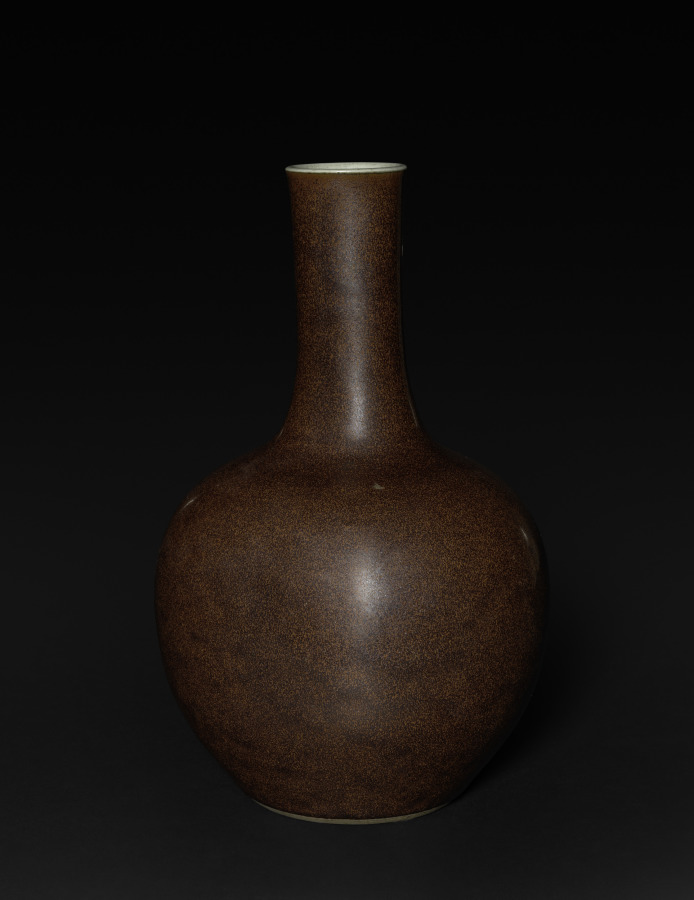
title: Vase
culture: China, Qing dynasty (1644–1911), Qianlong reign (1736–95)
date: 1736–95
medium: porcelain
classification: Ceramic